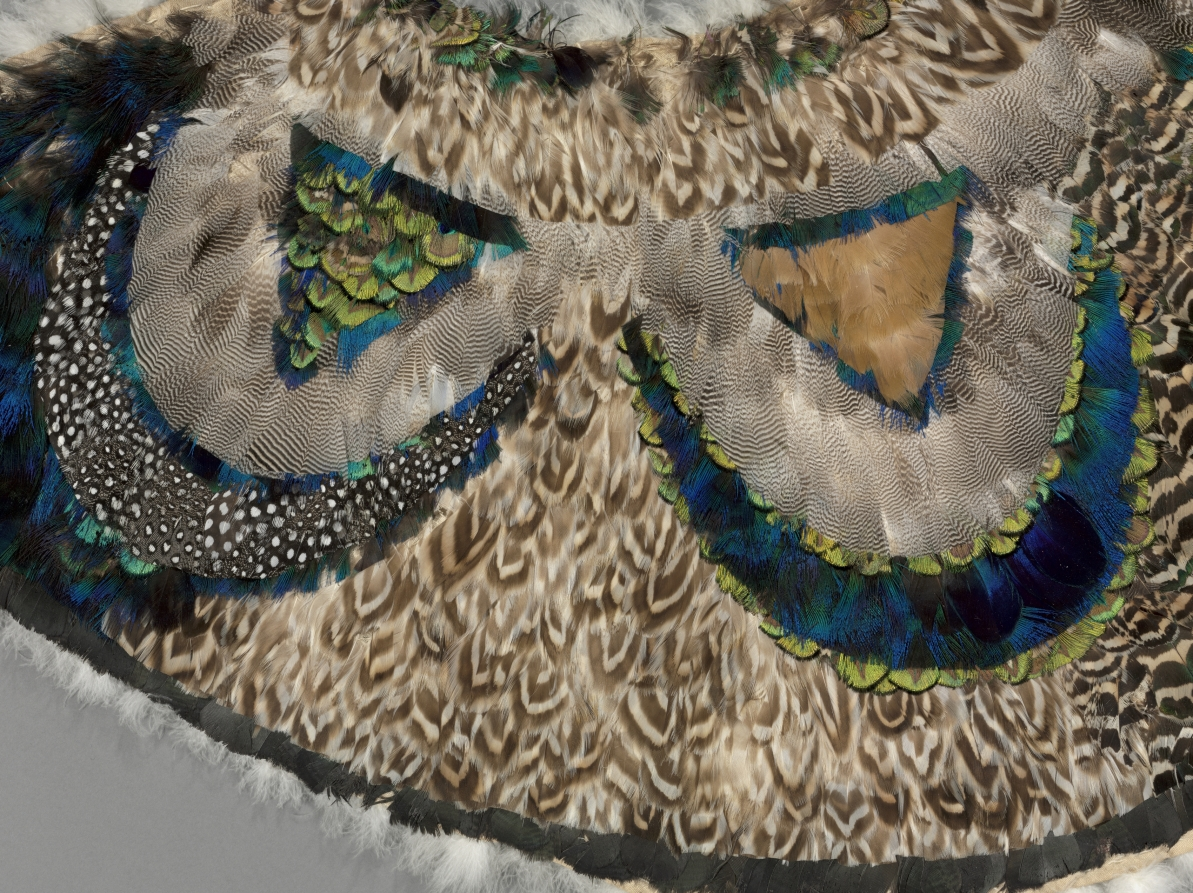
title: Pelerine (Collar or Cape)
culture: Northeastern Woodlands, Great Lakes/St. Lawrence River Region or Europe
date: c. 1830–1860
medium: Cotton, peacock feathers, guinea fowl feathers?, Gadwalls duck feathers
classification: Textile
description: Experts argue about collars of this type: Did a Great Lakes native artist make it, using as a model an English lady’s pelerine and exotic feathers obtained through trade? Or was the collar created by a European feather worker, perhaps after seeing the spectacular feather capes of native Hawaiian royals who visited England in 1824? There are arguments for both views—and for further research.